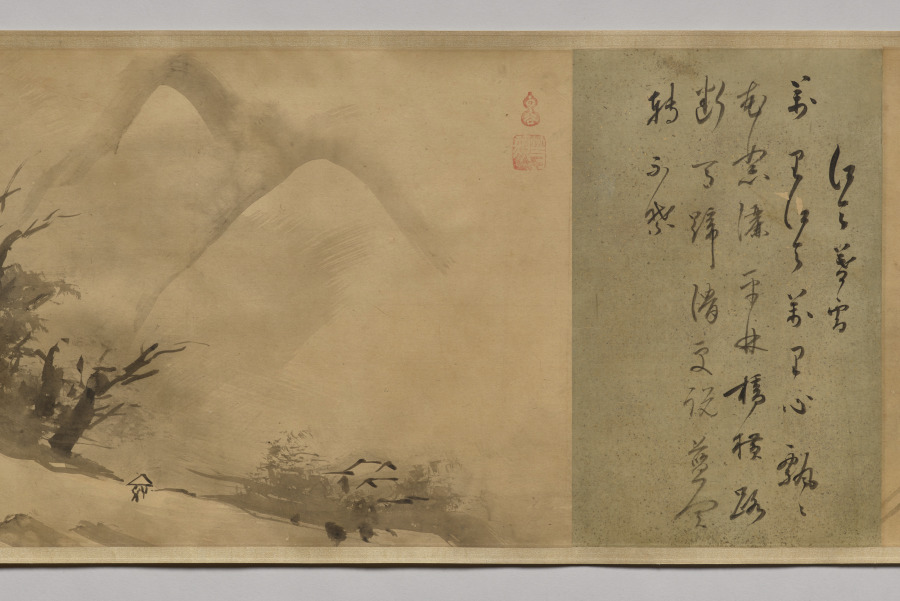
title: Poems and Pictures of the Eight Views of Xiao-Xiang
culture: Japan, Momoyama period (1573–1615)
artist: Unkoku Tōgan (Japanese, 1547–1618)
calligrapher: Inkei Gentetsu (Japanese, 1562–1612)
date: 1605–12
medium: Handscroll; ink on paper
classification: Painting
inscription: Each painting sealed with red gourd-shaped seal reading Unkoku (雲谷) and a square seal reading Tōgan (等顔).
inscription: Each painting prefaced with a titled poem on the Eight Views of Xiao-Xiang by Yujian Ruofen (active late 13th century) inscribed by Japanese Buddhist monk Inkei Gentetsu (1562–1612).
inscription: 右寫玉㵎之筆勢／雪舟末葉等顔筆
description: Unkoku Tōgan brushed these scenes using the splashed-ink technique associated in Japan with the Chinese monk Yujian Ruofen (active late 1200s). Xiao-Xiang refers to the region in present-day Hunan province, where the Xiang River and its tributaries converge. Each of the eight views evokes a time of day or season. The earliest surviving series of Xiao-Xiang paintings is by Wang Hong (active mid-1100s), but textual evidence tells us the theme appears earlier. It was later adopted in Japan and Korea, as seen here. The poems were inscribed by Inkei Gentetsu, the third abbot of the Rinzai Zen temple Tōshunji, Japan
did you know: The “Tō” of Tōgan comes from the name of painter Sesshū Tōyō (1420–1506).